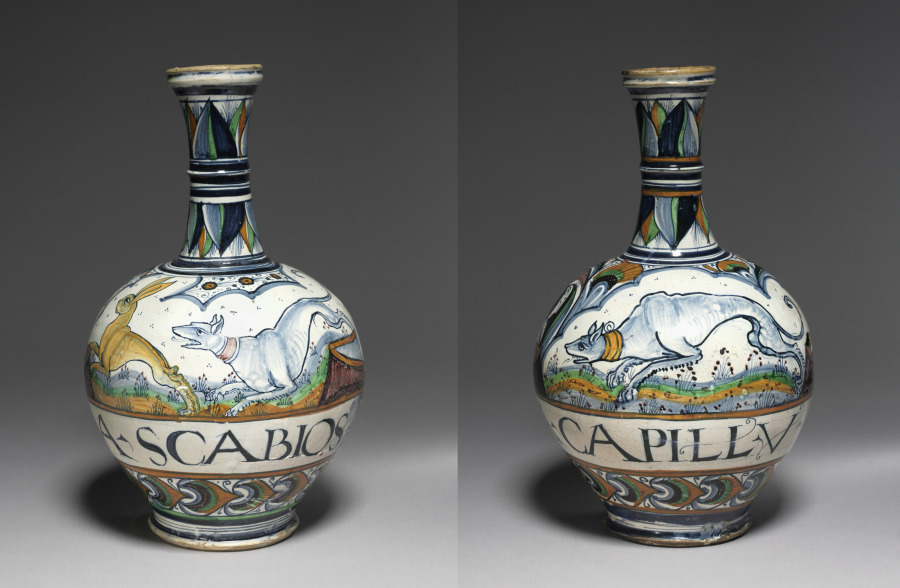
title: Pair of Pharmacy Bottles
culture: Italy, Papal States, Faenza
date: c. 1500–1510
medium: tin-glazed earthenware (maiolica)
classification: Ceramic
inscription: Written in lower ribbon band of 1943.52.1: A. SCABIOS. Written in lower ribbon band of 1943.52.2: A. CAPILLV.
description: The inscriptions on these two pharmacy bottles suggest that they held medicinal and domestic remedies. One bottle reads SCABIOS, or “scabious water,” which may refer to a teasel root compound that was used to clean and decontaminate velvet. Inscribed on the other bottle is the word CAPILLV, which was a liquid extracted from a fern-like plant commonly referred to as “maiden’s hair water.”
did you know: During the Renaissance, aristocrats tested the speed and agility of their greyhounds in a sport called “hare coursing.”